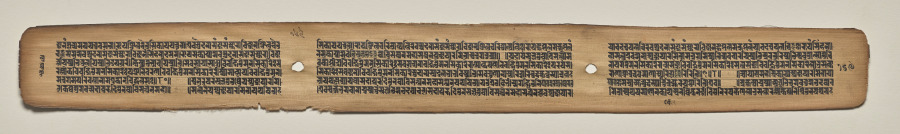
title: Text, folio 169 (verso), from a Manuscript of the Perfection of Wisdom in Eight Thousand Lines (Ashtasahasrika Prajnaparamita-sutra)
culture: Eastern India, Bihar, Vikramashila Monastery. Painting: Nepal, Kathmandu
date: Sunday, September 14, 1119 (year 239 of the Newar Samvat in the month of Ashvina)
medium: gum tempera and ink on palm leaves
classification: Painting